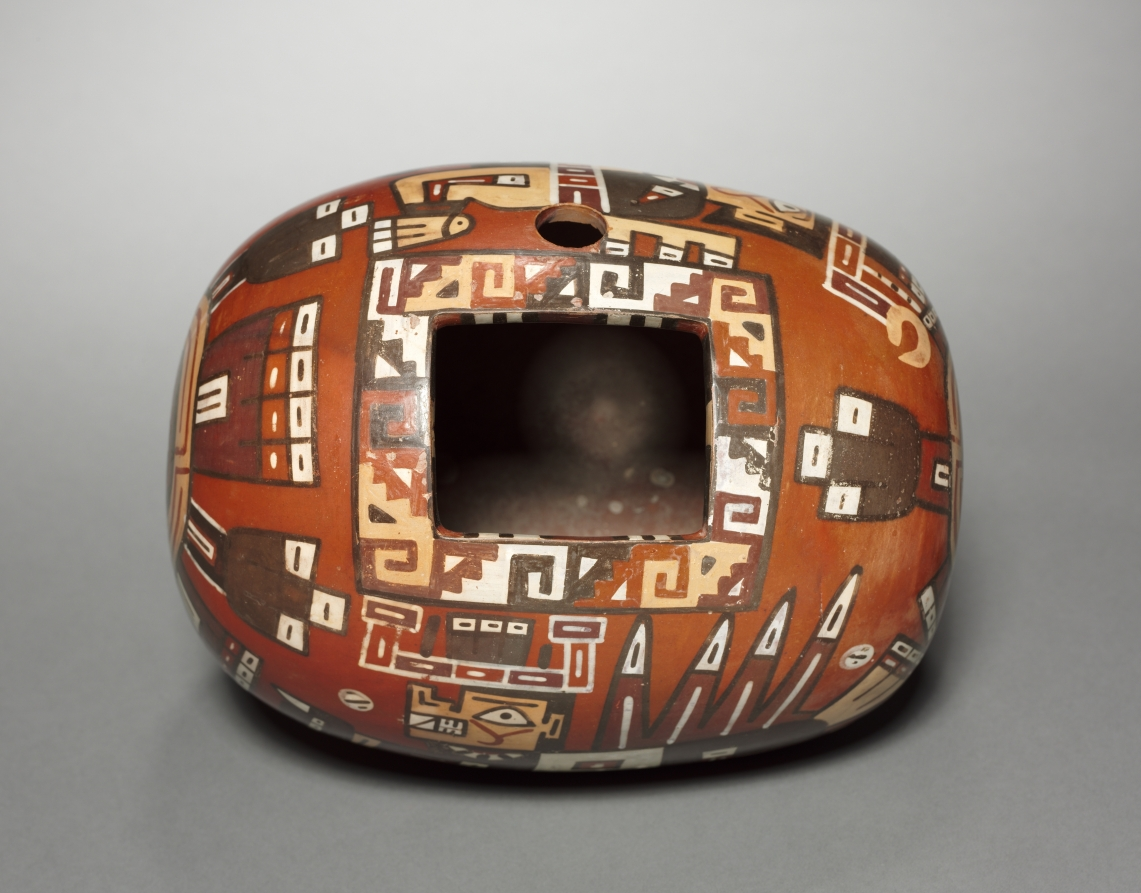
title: Container with Deity Head and Winged Attendants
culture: Central Andes, central coast, coastal Wari style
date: 600–1000 (Thermoluminescence date, 730–1190)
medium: ceramic and slip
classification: Ceramic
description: The head of the staff deity, the most important supernatural being depicted in Wari art, appears on the ends of this container, the function of which is mysterious. The sides feature two of the deity's attendants, each with a wing and N-shaped fangs drawn from the animal world. One of these creatures carries a staff, a supreme symbol of divine authority and power.